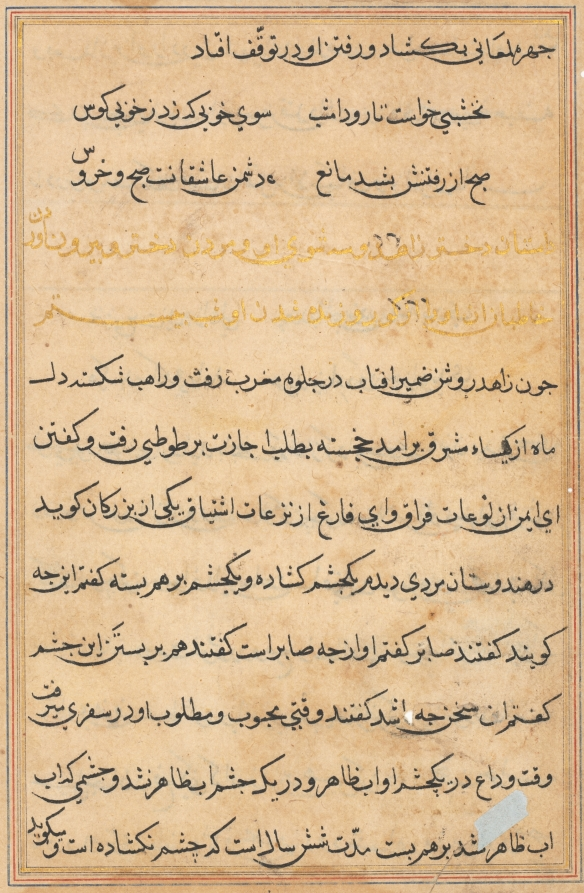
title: Page from Tales of a Parrot (Tuti-nama): text page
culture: Mughal India, court of Akbar (reigned 1556–1605)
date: c. 1560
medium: gum tempera, ink, and gold on paper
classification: Painting